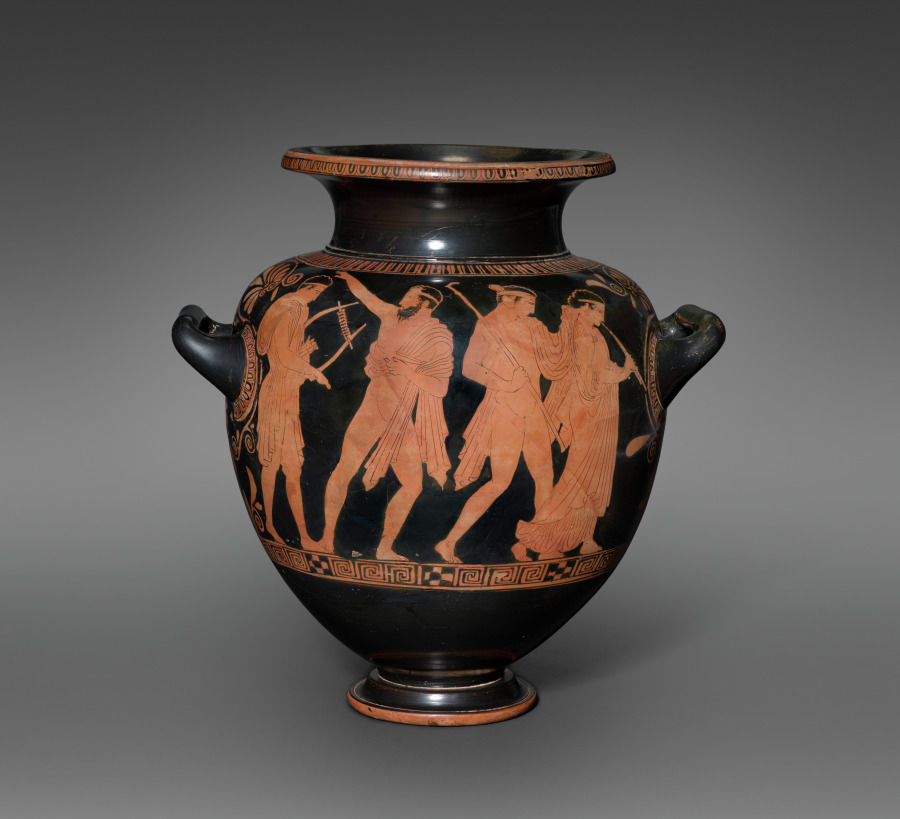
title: Red-Figure Stamnos (Mixing/Storage Vessel): Komos (Musicians and Revelers)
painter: attributed to Kleophon Painter (Greek, Attic, active c. 440–410 BCE)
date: c. 435–425 BCE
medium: Ceramic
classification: Ceramic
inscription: Κ Α Λ Ο Σ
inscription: Κ Α Λ Ο [Σ]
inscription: black '080'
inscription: black 'WF2'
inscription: black '0.19'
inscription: red '09.6'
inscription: partially removed red and white sticker, with number blacked out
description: Four lively figures move to the right across the front side of this stamnos, a vase used for storing and mixing wine. First comes a finely dressed woman playing the pipes, followed by three male figures, all nearly nude. The bearded one holds a drinking cup and reaches back, perhaps dancing, while the last in line concentrates on the music of his lyre.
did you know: The Athenian stamnos, a shape favored by the Etruscans, was made primarily for export.